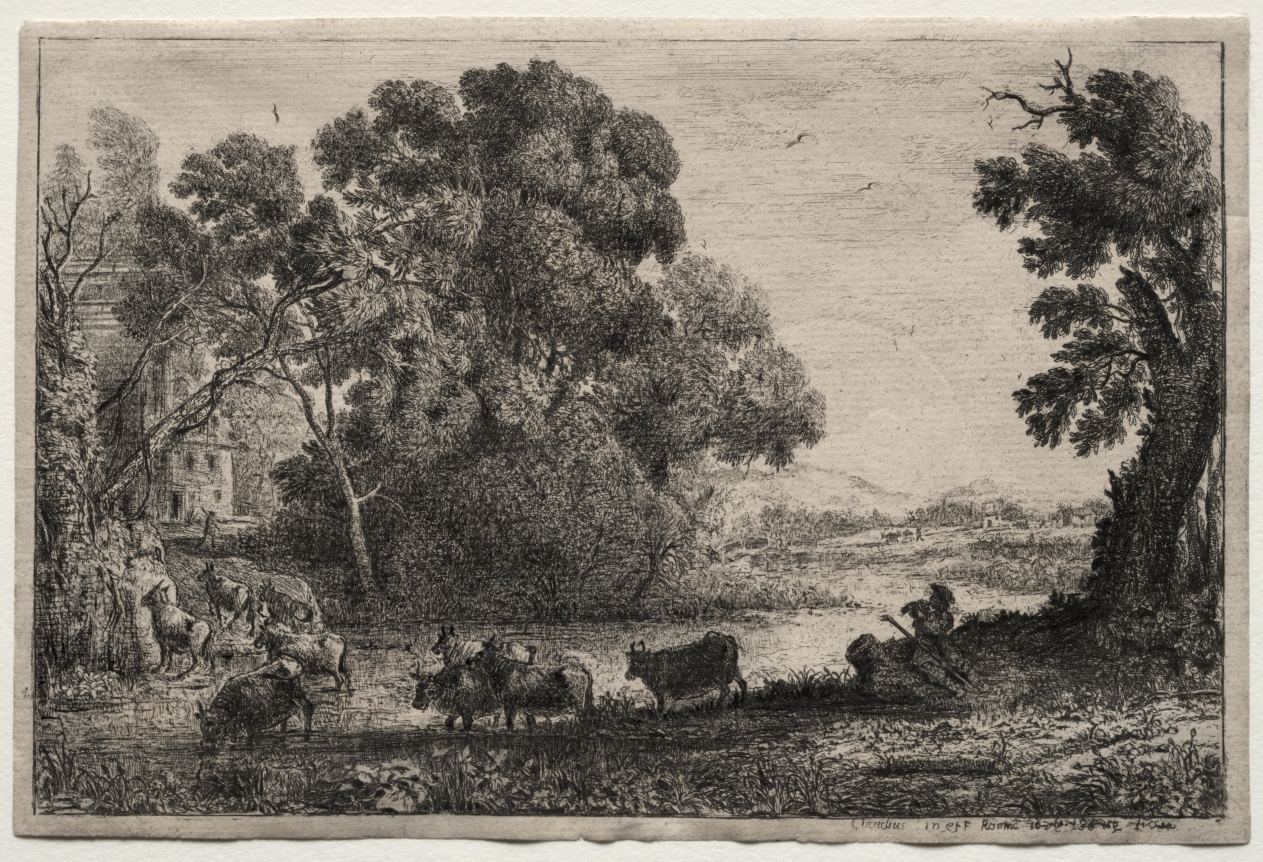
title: The Cowherder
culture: France, 17th century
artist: Claude Lorrain (French, 1604–1682)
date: 1636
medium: etching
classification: Print